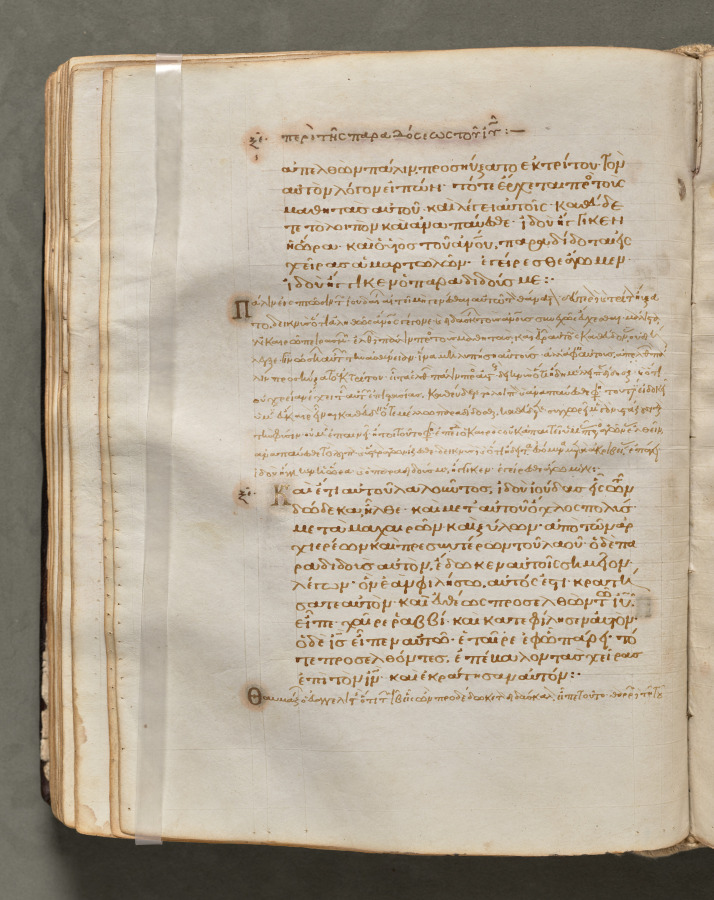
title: Text, folio 119 (verso), from a Gospel Book with Commentaries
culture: Byzantium, Constantinople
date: c. 1000–1100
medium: ink, tempera, and gold on vellum; leather binding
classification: Bound Volume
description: Each of the four gospels in this book opens on a page with brilliantly illuminated borders depicting the author of the text as well as birds-principally peacocks, symbols of the immortality of the soul-and fountains, representing the fountain of life and the salvation of the soul. This volume consists of 428 leaves with texts in Greek. Its level of sophistication suggests that it was probably written and decorated in a monastery in Constantinople.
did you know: Gospel Books were carried in procession through Byzantine churches.